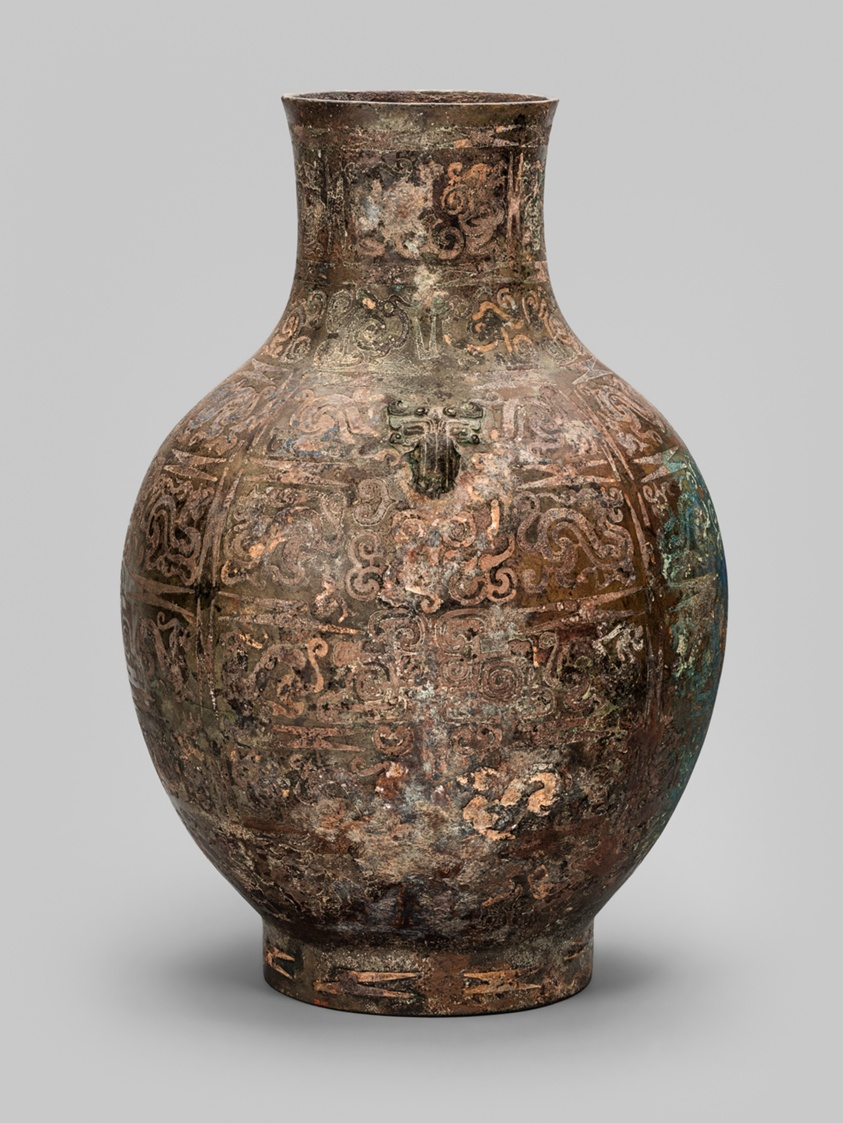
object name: Vessel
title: Jar (hu)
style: Chinese (culture or style)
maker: China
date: Eastern Zhou dynasty, Warring States period (475–221 B.C.)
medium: Bronze inlaid with copper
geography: China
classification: bronze; metal; vessel; asian art